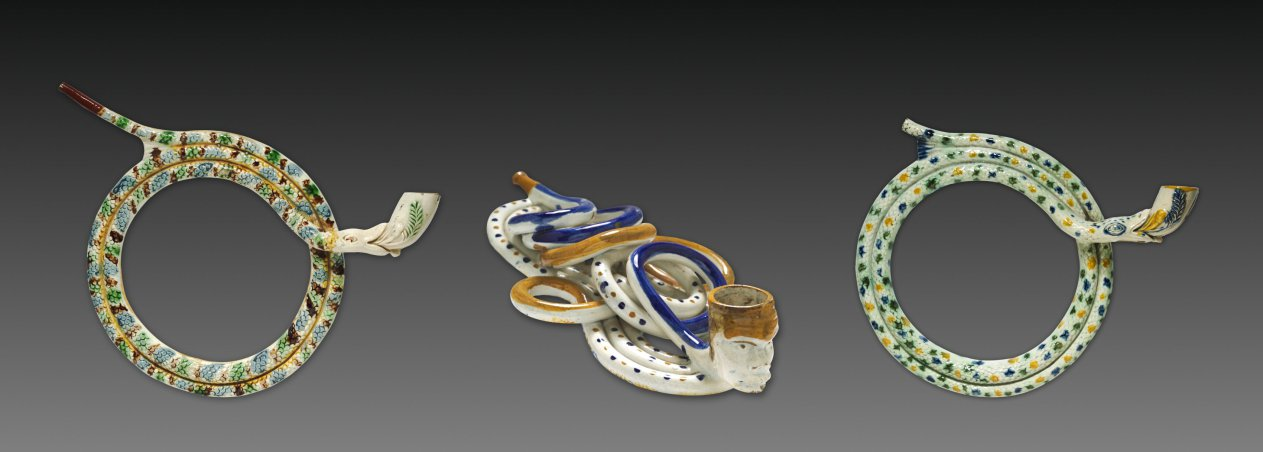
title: Pipe in the Form of a Twisted Man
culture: England, Staffordshire, late 18th-early 19th Century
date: 1780–1820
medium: lead-glazed earthenware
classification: Ceramic